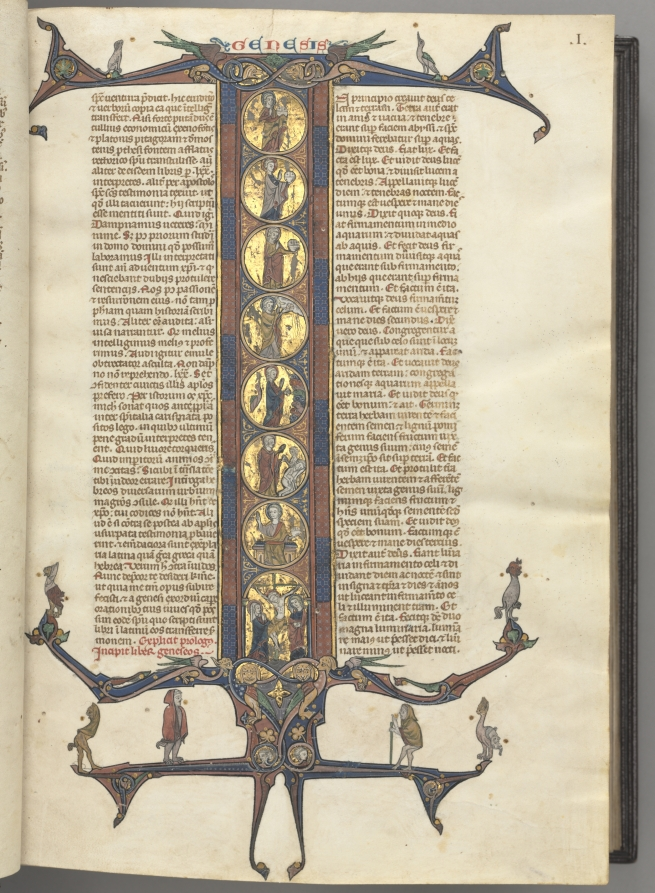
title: Fol. 1r, Genesis, with a full-length historiated initial I, showing the Creation and the Crucifixion, all on burnished gold grounds, with diapered pink and blue frames and cusped dragon and foliage extensions at top and bottom, on which are perched a vari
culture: Southern France, Toulouse(?), 13th century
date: c. 1275–1300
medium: ink, tempera and gold on vellum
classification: Bound Volume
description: Biblical manuscripts were highly prized and important possessions of churches, monasteries, cathedral schools, and universities throughout medieval Europe. The biblical texts were known as the vulgate, the translations made by Saint Jerome in the fourth century from Hebrew and Greek into Latin, which became the definitive and official Latin version of the Roman Church. In the 13th century, the bible was, for the first time, produced as a single volume with an officially sanctioned sequence to its books and chapters as illustrated by this example. The very extensive decoration of this bible is arranged hierarchically to indicate the relative importance of the various texts so that full or almost full-page initials mark the openings of the first prologue, Genesis, and the first Gospel; historiated initials mark the beginning of each book and illuminated initials mark the Prologues.